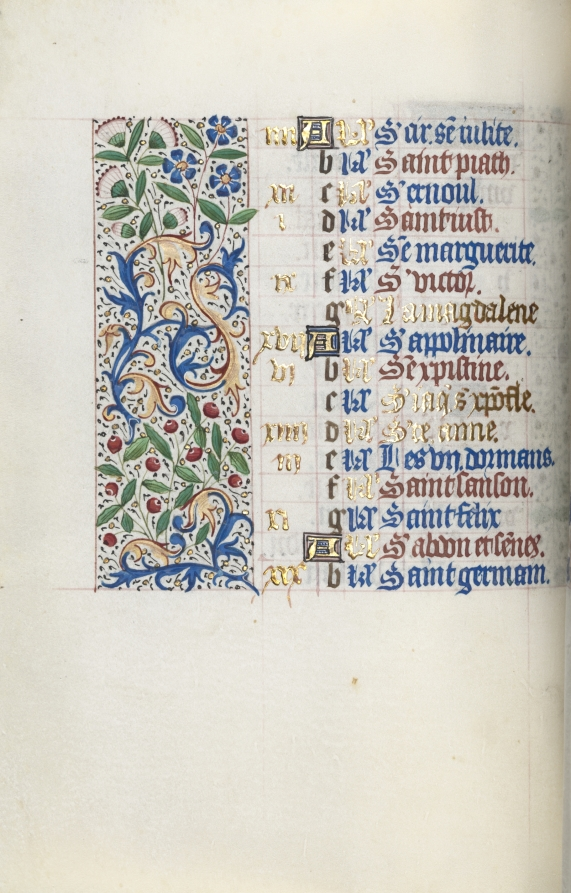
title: Book of Hours (Use of Rouen): fol. 7v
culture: France, Rouen, 15th century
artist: Master of the Geneva Latini (French, active Rouen, 1460–80)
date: c. 1470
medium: ink, tempera, and gold on vellum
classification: Bound Volume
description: In the late 1400s and early 1500s Rouen was an established and important center of book production. The city’s cathedral had a wealthy chapter that spent large sums of money to commission books and to maintain its extensive library. The stationers and booksellers would have likely been concentrated in or near the cathedral precinct. This artist, named after a manuscript now in Geneva, was Rouen’s principal illuminator during the second half of the 1400s.